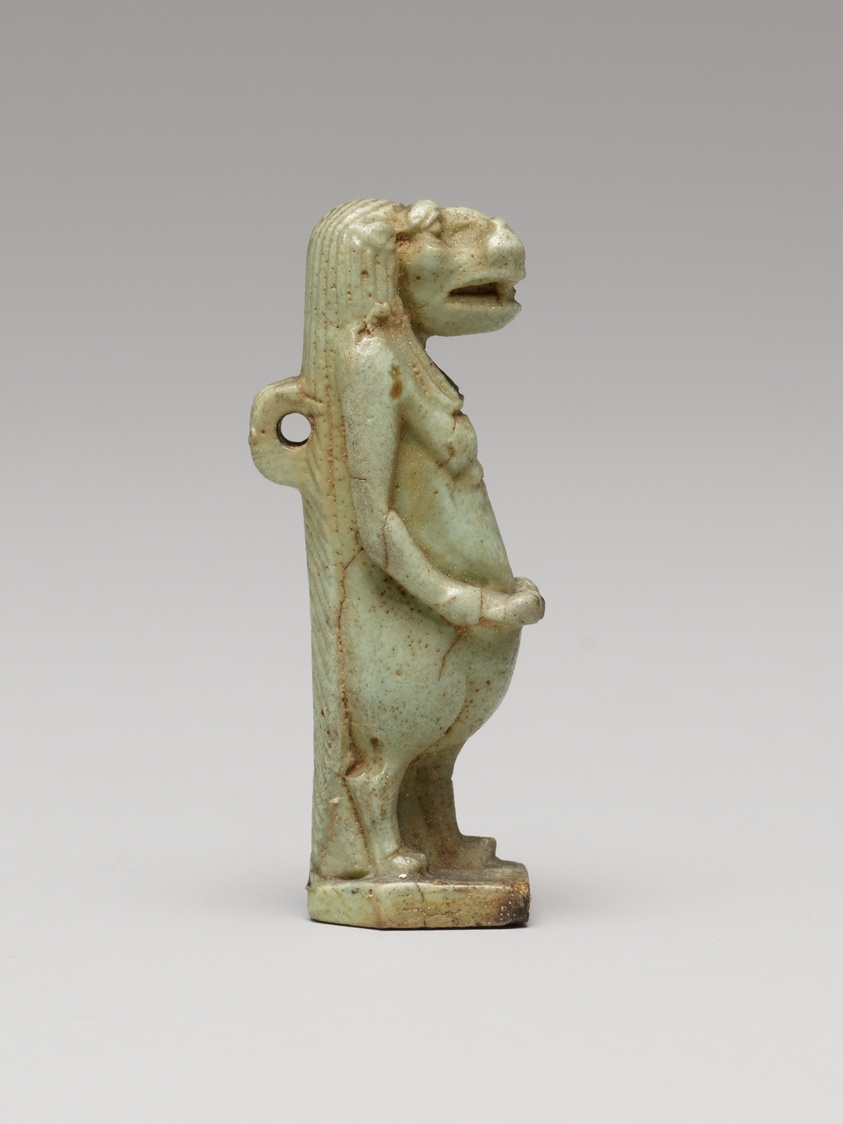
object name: Costume and Accessories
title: Amulet of Taweret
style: third intermediate period, egyptian, ancient, late period (egyptian)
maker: Egyptian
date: Third Intermediate Period–Late Period (about 1069–332 BCE)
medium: Faience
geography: Egypt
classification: amulet; ceramics; jewelry; ancient art; costume; faïence (composite material)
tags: goddesses